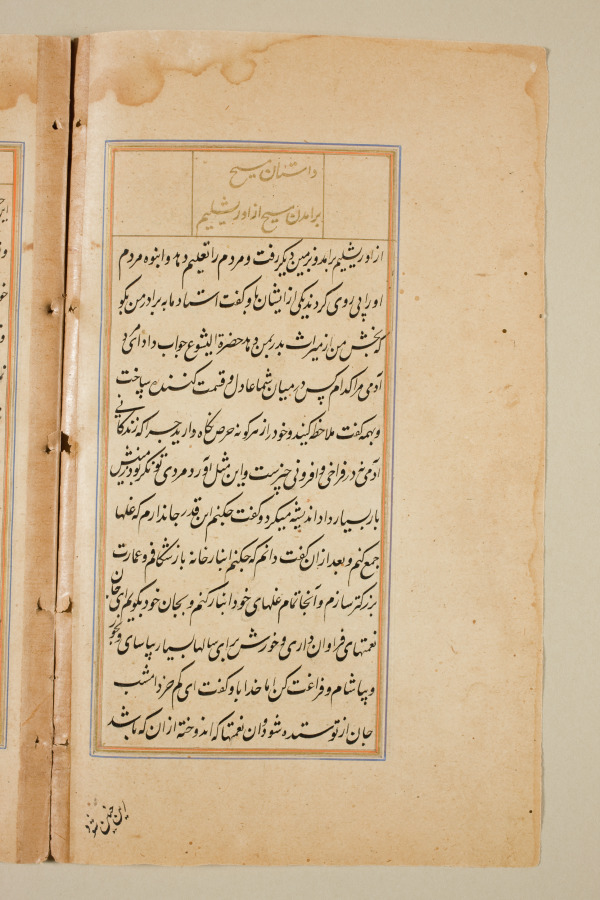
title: Text page from a Mirror of Holiness (Mir’at al-quds) of Father Jerome Xavier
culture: Mughal India, Allahabad, made for Prince Salim (1569–1627)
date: 1602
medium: Ink and gold on paper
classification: Manuscript